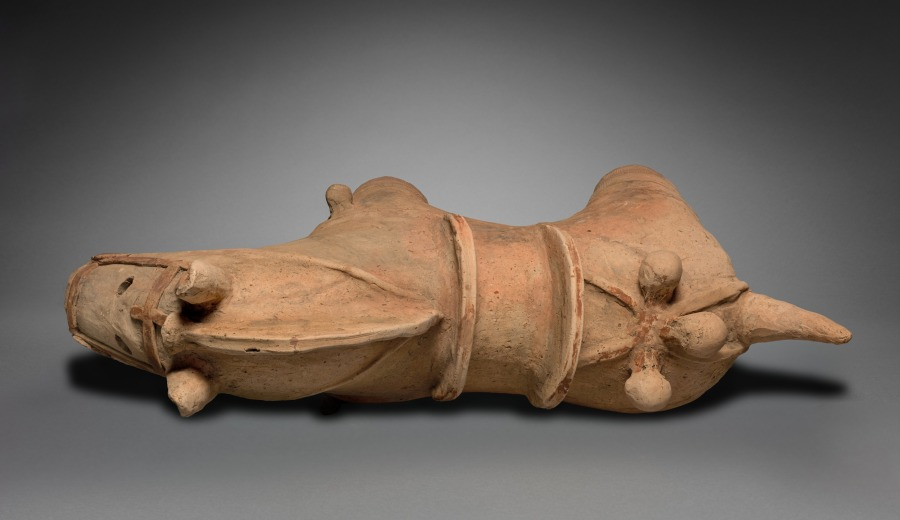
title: Haniwa Horse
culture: Japan, Kofun period (300–710 CE)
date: 400s–500s CE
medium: earthenware with traces of pigment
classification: Sculpture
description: This horse’s tack, with its round bells, resembles saddlery in fashion in Korea during the 400s–500s CE. Concurrent with mass migration from the Korean Peninsula, tombs covered with large earthen mounds similar to those on the Asian continent began to appear in Japan around the year 300 CE. Called “old mounds” (kofun), their surfaces were covered with hollow clay cylinders (haniwa). Sculptures of animals, buildings, and finally human figures followed, developing over the ensuing three centuries.